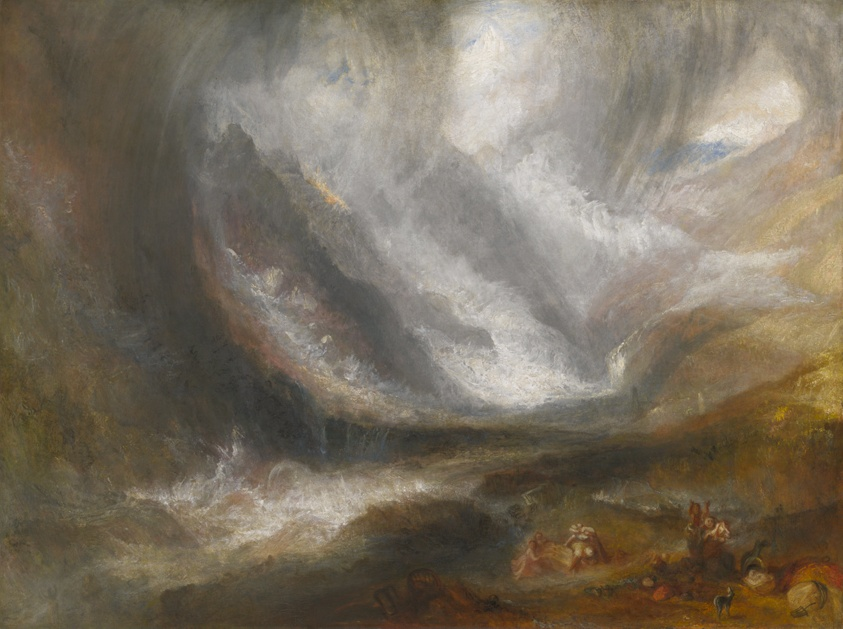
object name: Painting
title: Valley of Aosta: Snowstorm, Avalanche, and Thunderstorm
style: nineteenth century, 19th century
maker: Joseph Mallord William Turner (English, 1775–1851)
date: 1836/37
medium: Oil on canvas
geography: England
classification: painting; paint; oil paintings (visual works); oil on canvas; british; european painting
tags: weather/seasons, women, woman, Valley, storms, snow, rocks, nature, natural disasters, figures, dog, children, animals